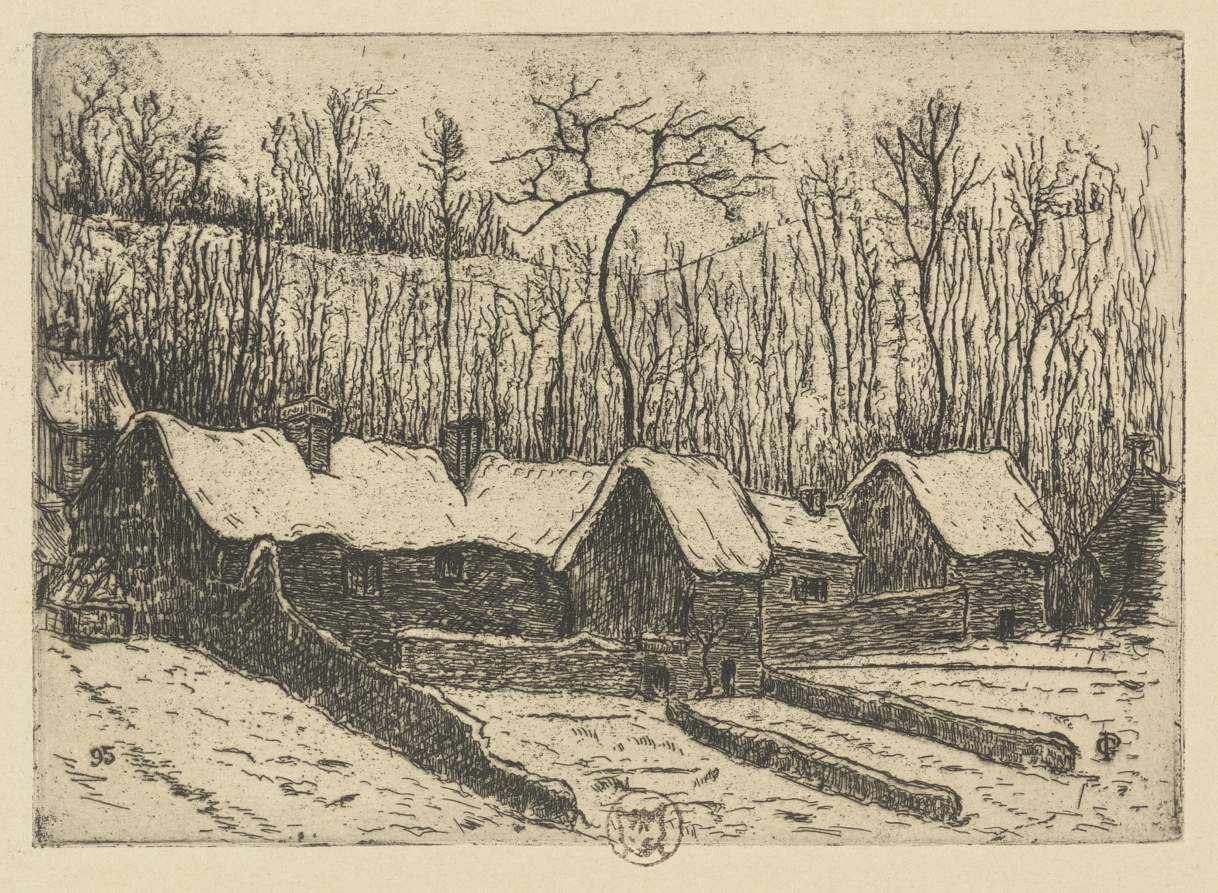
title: Six Etchings: The Thatched Bakery, Auvers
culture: France, 19th century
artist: Paul Gachet (French, 1828–1909)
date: 1895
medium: etching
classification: Print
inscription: verso, in brown ink: Les Chaumes de Four, Auvers